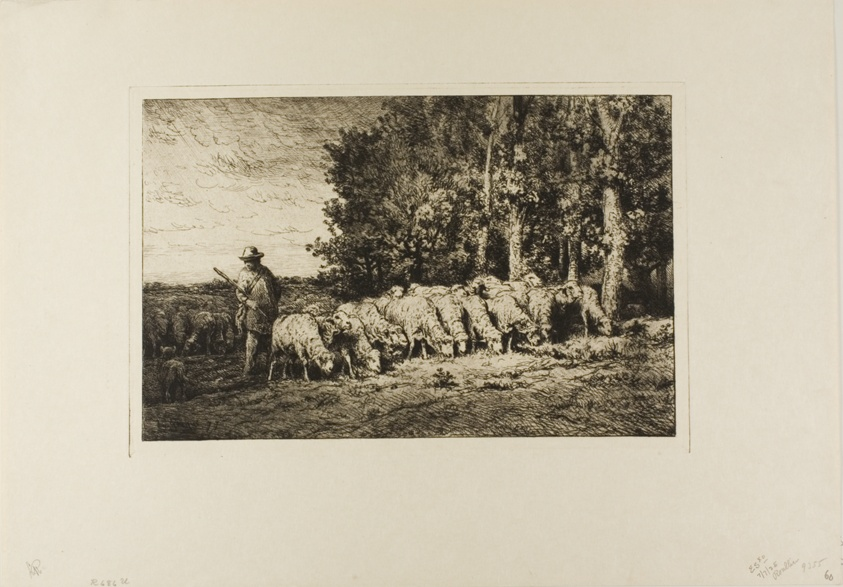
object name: Print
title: Flock of Sheep at the Edge of a Wood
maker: Charles Émile Jacque (French, 1813-1894)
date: 1877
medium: Etching, drypoint and aquatint on ivory simili-Japanese paper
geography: France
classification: etching; print; prints and drawing